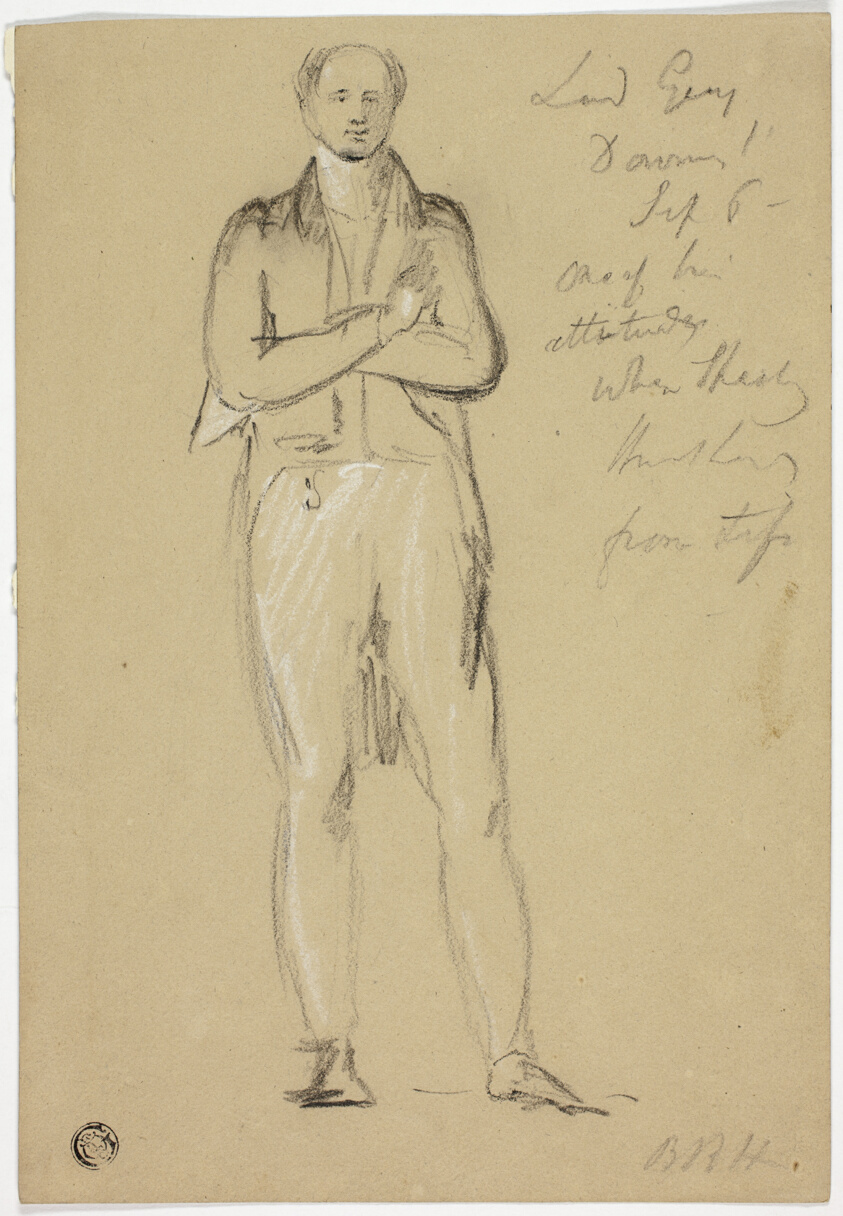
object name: Drawing and Watercolor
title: Lord Gray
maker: Benjamin Robert Haydon (English, 1786-1846)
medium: Charcoal, heightened with white chalk, on tan wove paper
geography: England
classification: charcoal; drawings (visual works); prints and drawing